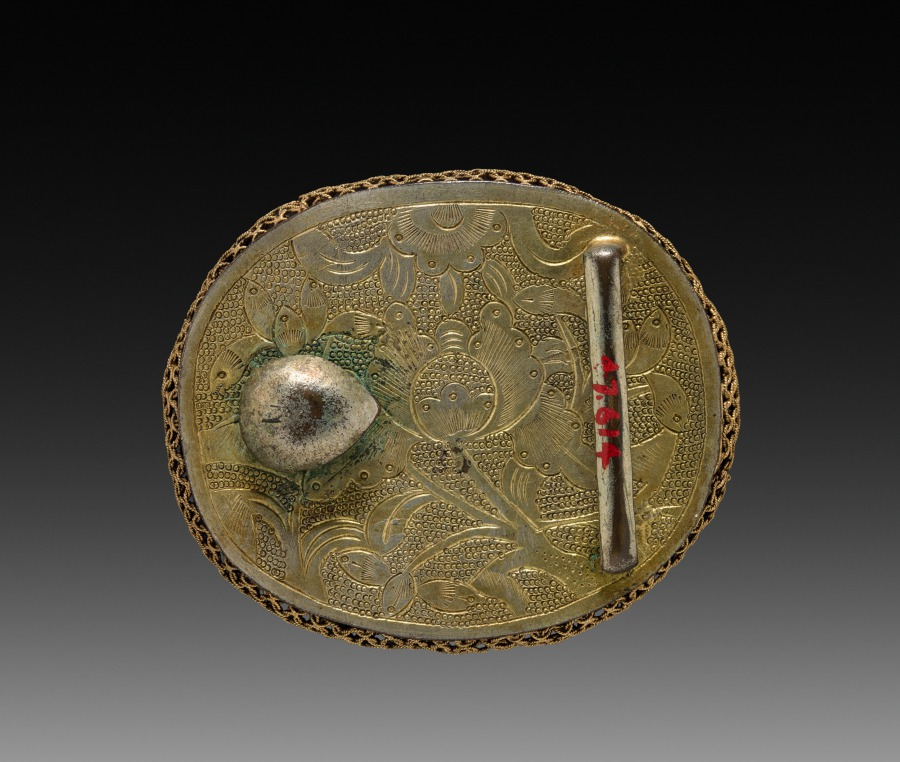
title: Buckle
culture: China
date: 1900s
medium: silver gilt and jade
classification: Jewelry